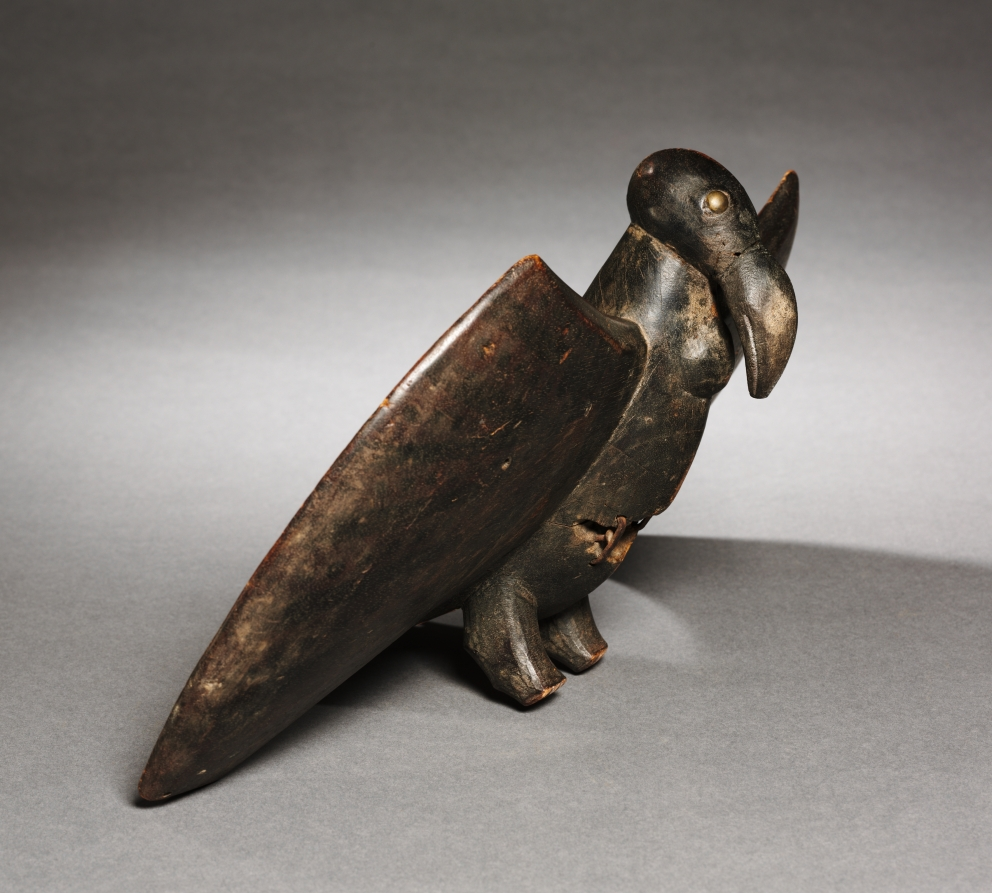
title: Bird Standard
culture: Africa, West Africa, Côte d'Ivoire, Senufo-style carver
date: early to mid-1900s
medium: Wood and upholstery studs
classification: Sculpture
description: An eagle depicted in flight originally surmounting a long staff, the bird standard is offered to the winner of a hoeing contest between young men. The competition is not only meant to promote social cohesion and solidarity, it also serves to encourage fertility. Honoring the endurance of a victorious farmer, such a bird standard is also used as a display sculpture during the funeral of a former champion or a member of his courtyard or family unit.